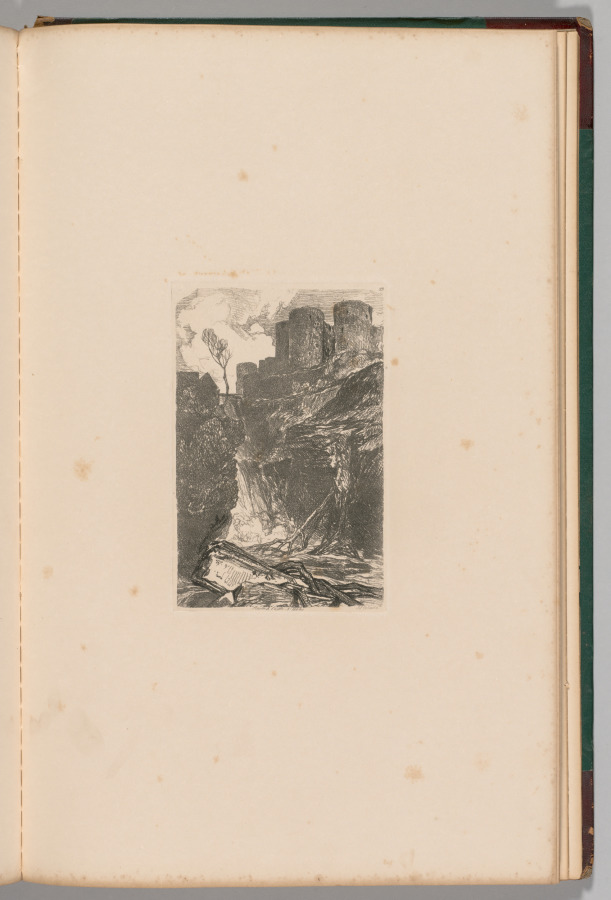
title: Liber Studiorum: Plate 29, Harlech Castle, N. Wales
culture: England, 19th century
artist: John Sell Cotman (British, 1782–1842)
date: 1838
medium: softground etching, from a bound volume containing 48 plates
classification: Bound Volume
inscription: In plate, within image, upper right: 29; in plate, below image: Harlech Castle, N. Wales JS Cotman